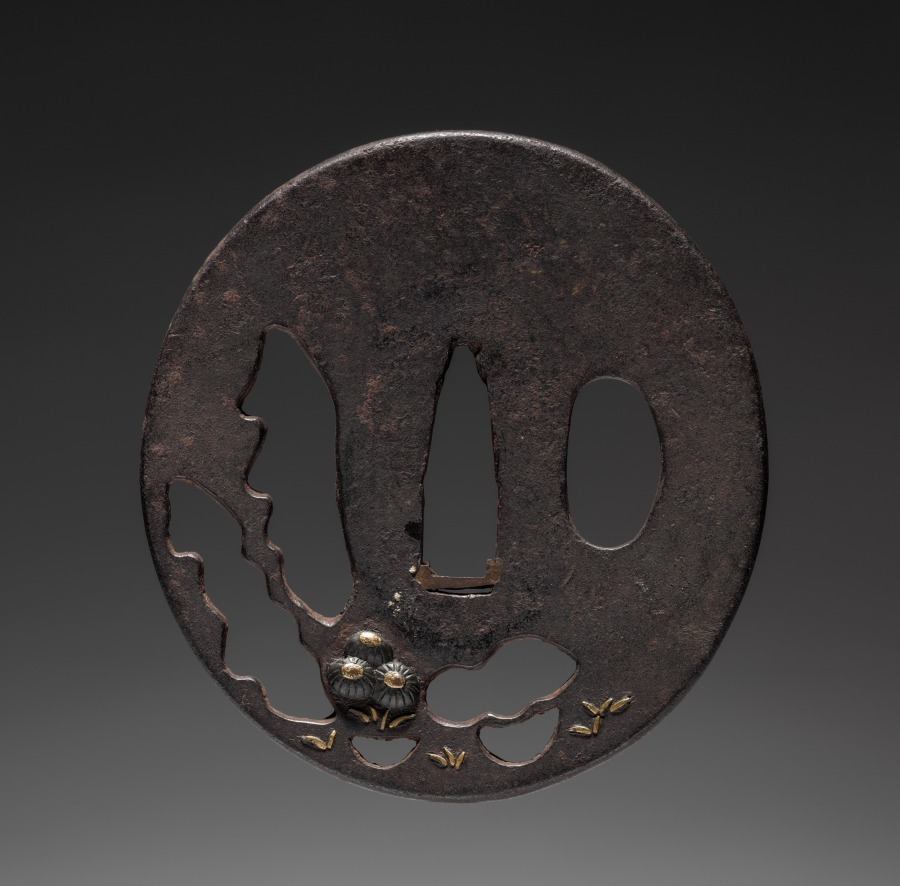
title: Sword Guard (Tsuba) with Dandelion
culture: Japan, possibly Edo period (1615-1868)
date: c. 1615–1868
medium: iron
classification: Arms and Armor